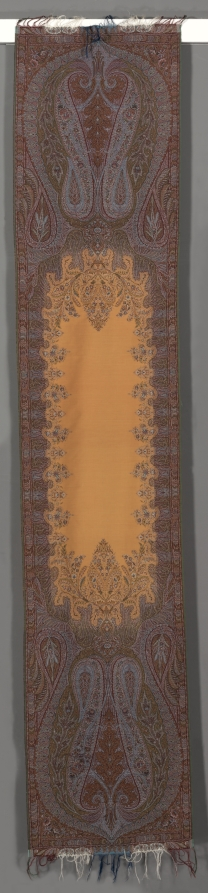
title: Long Stole with Botehs and Orange Center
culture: Austria, England, France, or Scotland, 19th century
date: 1850–55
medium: supplementary weft pattern, wool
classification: Textile